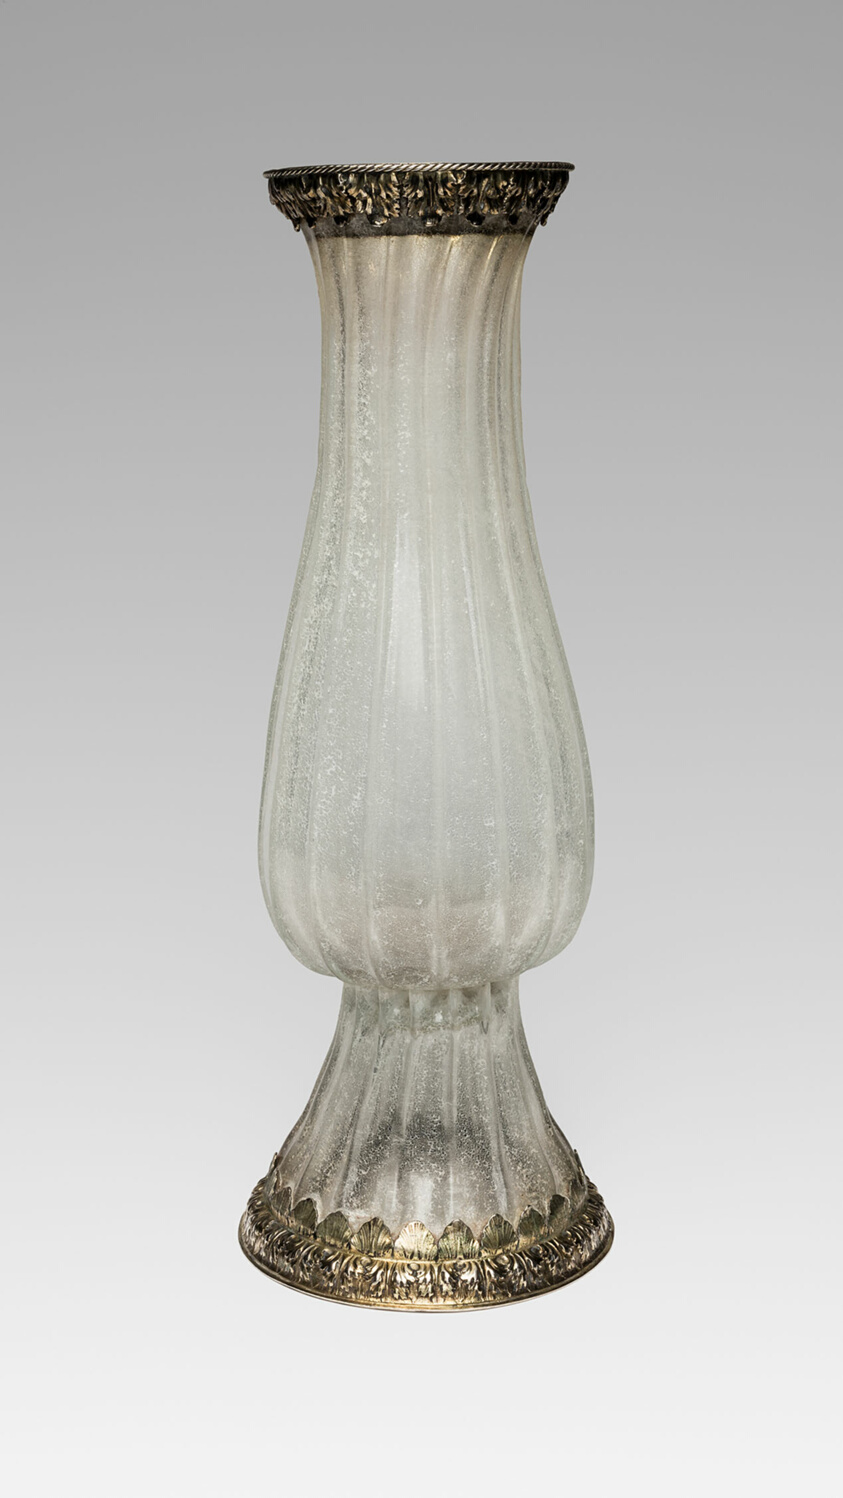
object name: Glass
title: Vase (One of a Pair)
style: Baroque, 17th Century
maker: Northern Netherlands; Mounts possibly English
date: c. 1675–c. 1685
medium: Glass and gilt silver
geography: Northern Netherlands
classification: vase; glass; decorative arts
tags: vases, vessels, display, garnitures